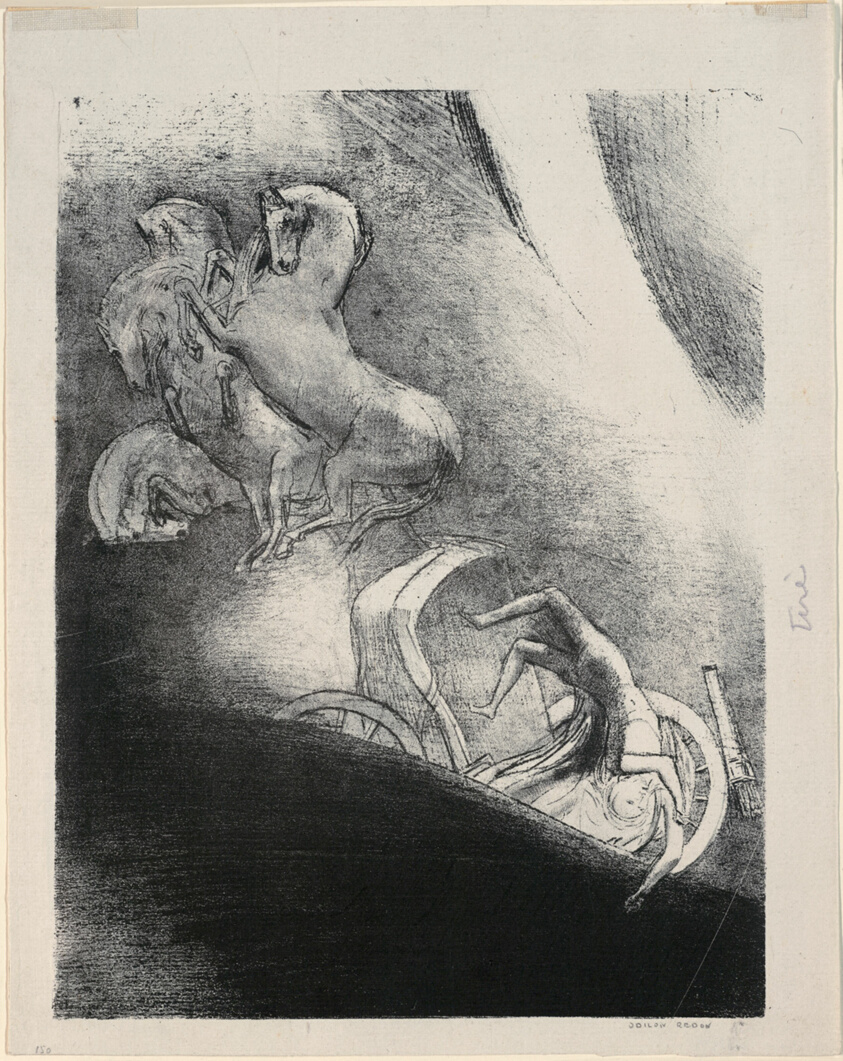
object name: Print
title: He Falls Head Foremost Into the Abyss, plate 17 of 24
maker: Odilon Redon (French, 1840-1916)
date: 1896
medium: Lithograph in black on light gray loose chine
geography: France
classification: lithograph; print; prints and drawing; paper